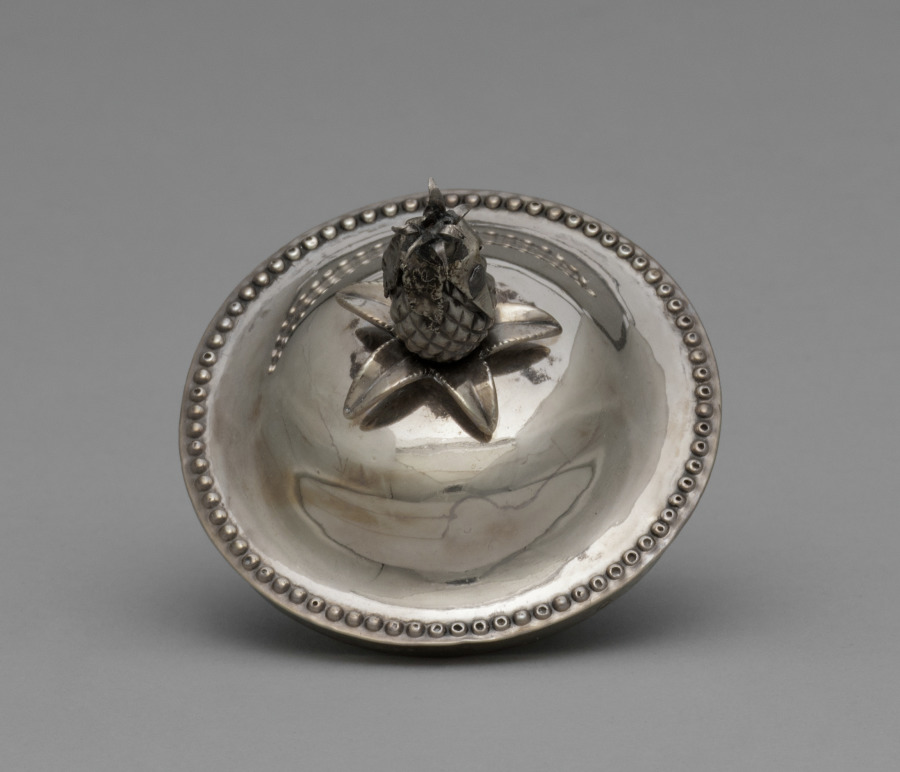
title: Teapot (lid)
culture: America, Pennsylvania, Philadelphia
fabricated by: John David (American, 1736–1793)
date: c. 1790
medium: silver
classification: Silver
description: This teapot may have belonged to Dr. Enoch F. Edwards, George Washington’s personal physician.